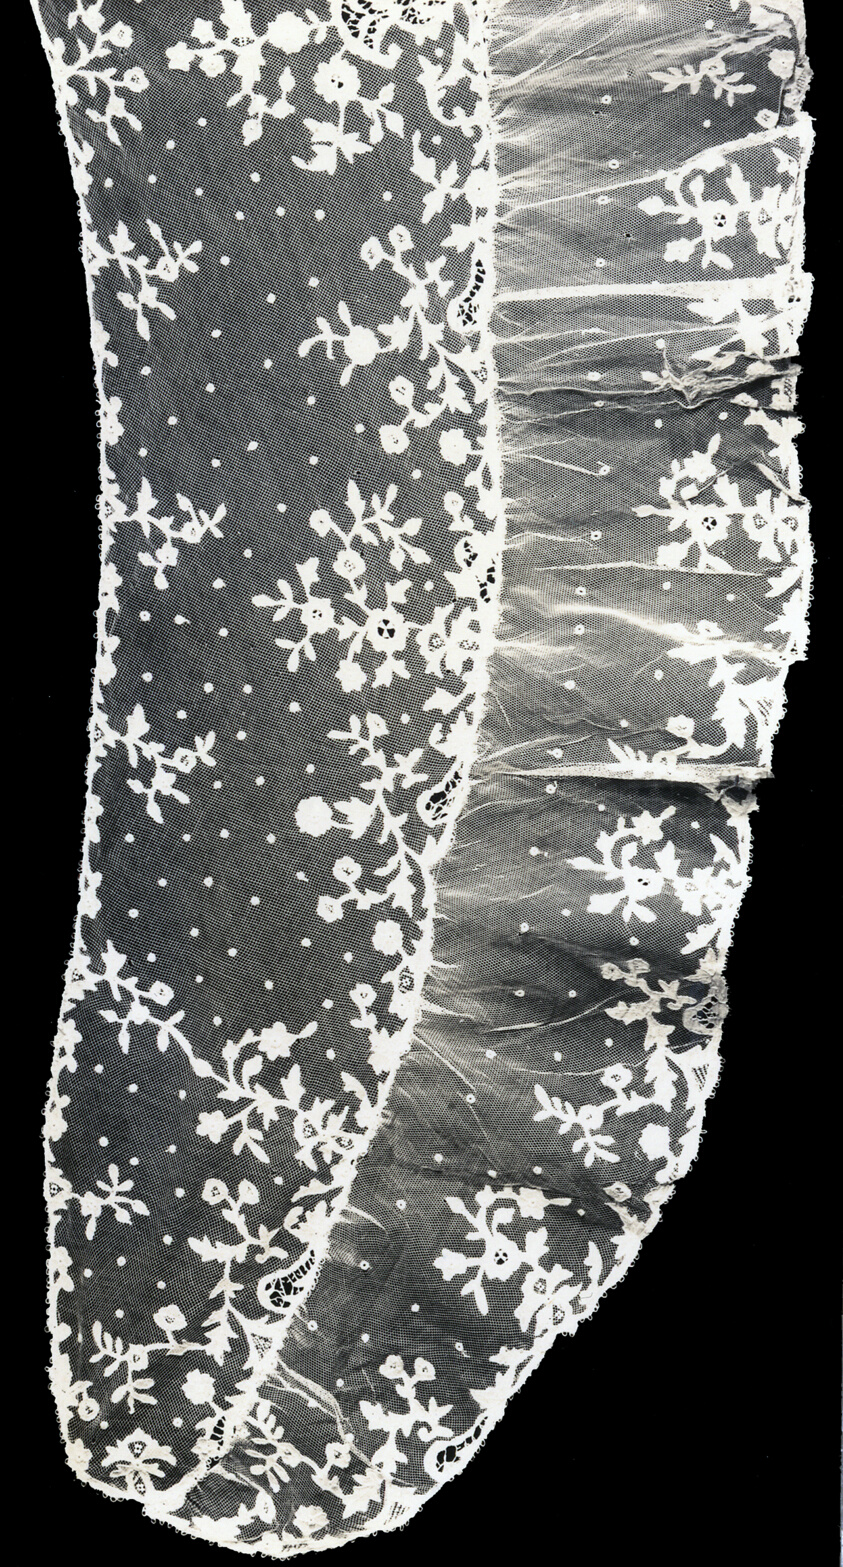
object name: Textile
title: Fichu with Frilled Outer Edge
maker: Ireland, Carrickmacross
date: 1850/75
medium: Cotton, machine-made net; appliquéd with plain weave; cut and drawn work filled with buttonhole bars decorated with buttonhole picots and darned points; embroidered in cross, darning, and overcast stitches; decorated with buttonhole wheels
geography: Carrickmacross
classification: textile; lace - mixed; lace